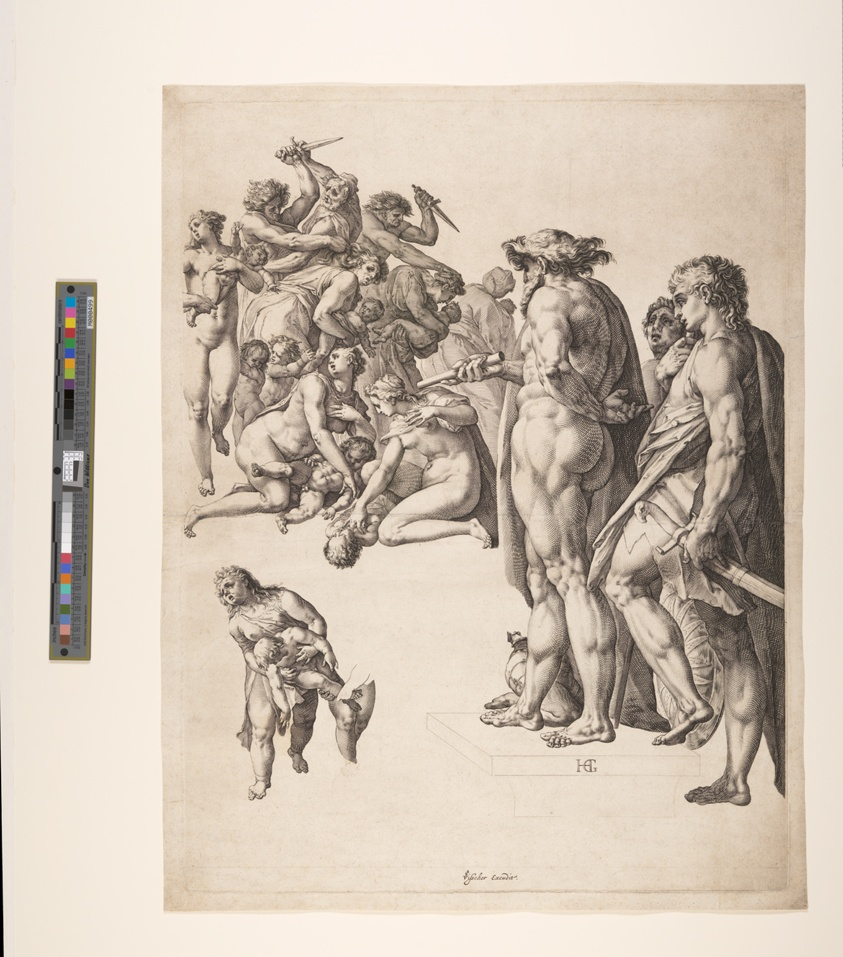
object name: Print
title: The Massacre of the Innocents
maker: Hendrick Goltzius (Dutch, 1558–1617)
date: c. 1585-86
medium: Engraving on ivory laid paper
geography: Netherlands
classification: engraving; paper; print; prints and drawing